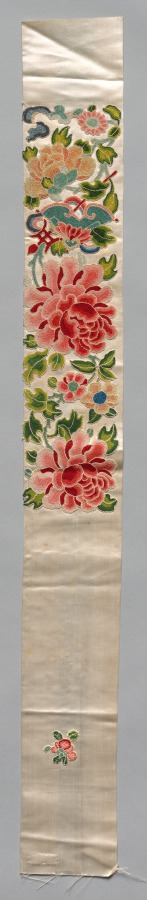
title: Sleeve Band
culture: China, Qing dynasty (1644-1911) or Republican period (1912-49)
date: 1880–1940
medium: Silk, embroidery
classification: Garment